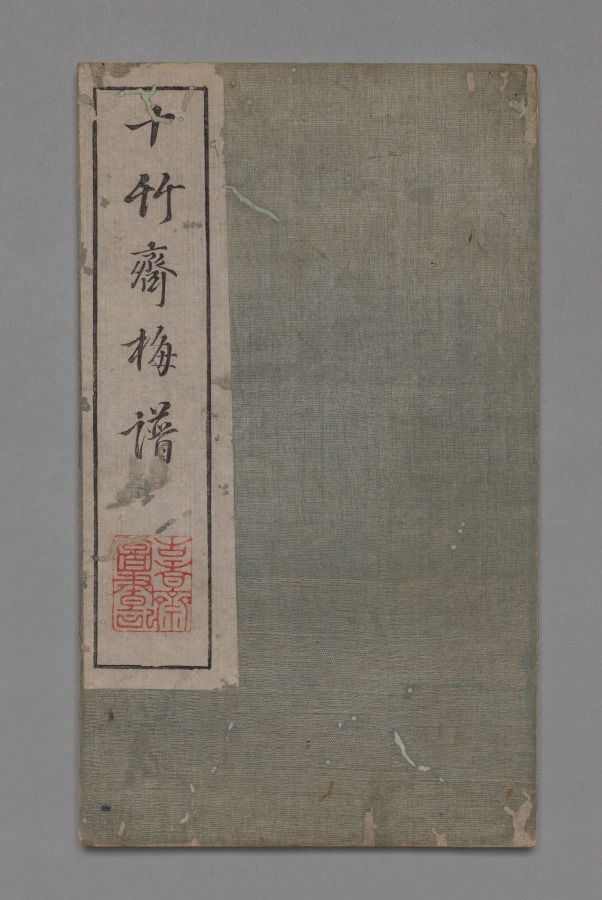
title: Ten Bamboo Studio Painting and Calligraphy Handbook (Shizhuzhai shuhua pu): Plum Blossoms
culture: China, Qing dynasty (1644-1911)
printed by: Hu Zhengyan (Chinese, c. 1584–1674)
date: 1633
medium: Woodblock-printed book; ink and colors on paper; first edition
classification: Print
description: Color printing reached a level of perfection in the early 1600s, as seen in this Ten Bamboo Studio Collection of Calligraphy and Painting and the Mustard Seed Garden Manual of Painting (printed 1679 and 1701). The painterly quality, precision in registering (aligning) the woodblocks, and harmonious colors made them the most successful color print editions in Chinese history. Both editions were printed and compiled in Nanjing, spread nationwide, and had a great impact on the arts in Japan and Korea.